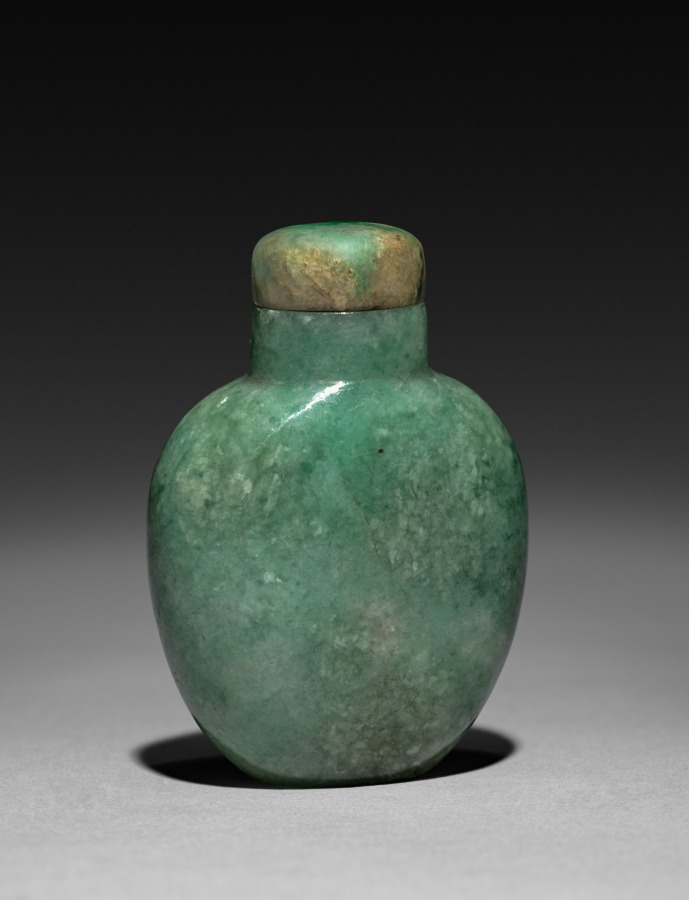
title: Snuff Bottle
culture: China, Qing dynasty (1644-1911)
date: 1644–1911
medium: glass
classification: Glass